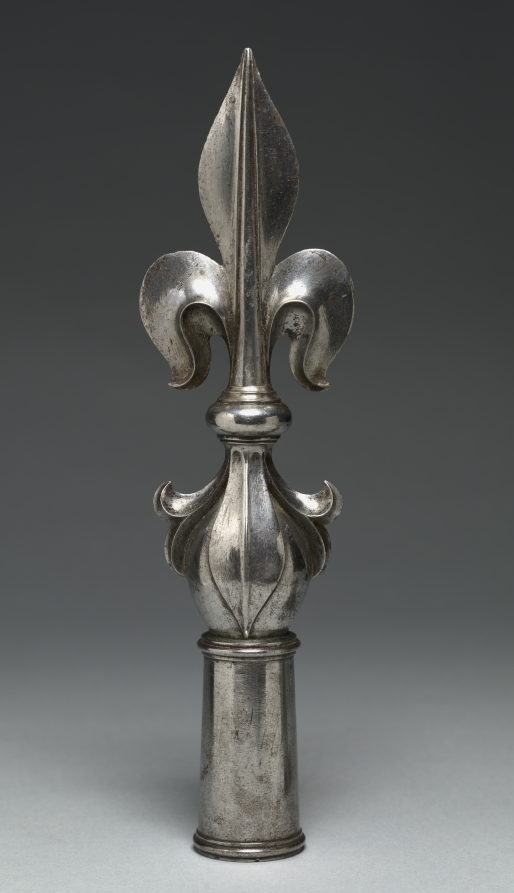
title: Banner Head in the Form of a Fleur-de-lys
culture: France, 18th century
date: 1700s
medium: steel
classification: Arms and Armor